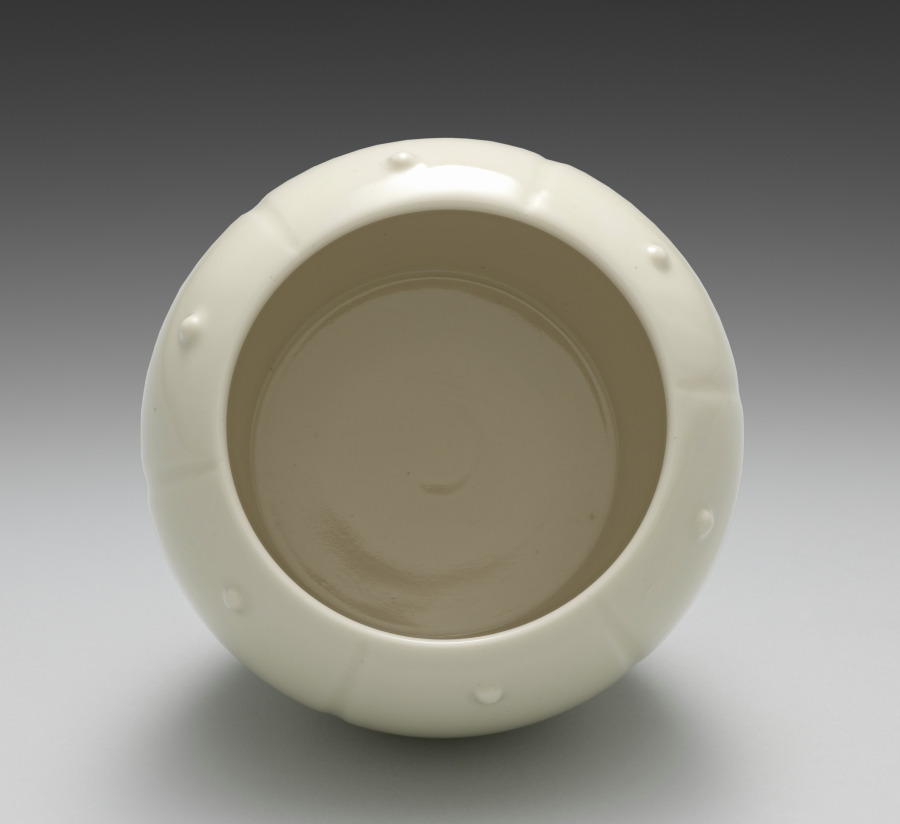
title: Container from Lit Charcoal and Ash Containers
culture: Japan, Meiji period (1868–1912)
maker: Seifū Yohei III (Japanese, 1851–1914)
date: 1893–1914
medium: One from a set of four containers; porcelain with molded design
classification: Ceramic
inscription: 清風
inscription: The storage box for this set is inscribed and impressed with seals.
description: The box lid for these six-lobed lit charcoal and ash containers, or hiire, identifies them as kōhakuji, another of Yohei III’s translucent cream colors over ivory clay bodies. One might translate the name as “lustrous pearl[–glazed ivory] porcelain.” A hiire was filled with ash with burnt coals at the center so that embers and tobacco ash could be discarded safely during a gathering. Each of the lobes on the containers has a round protrusion set below the rim. The studlike pattern is called ruiza. The term is also used to describe the pattern that rings the shoulder of some flower vases or metal kettles used in chanoyu.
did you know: The Seifu studio generally followed the standard practice in Japan for identifying the artist and object in box inscriptions.